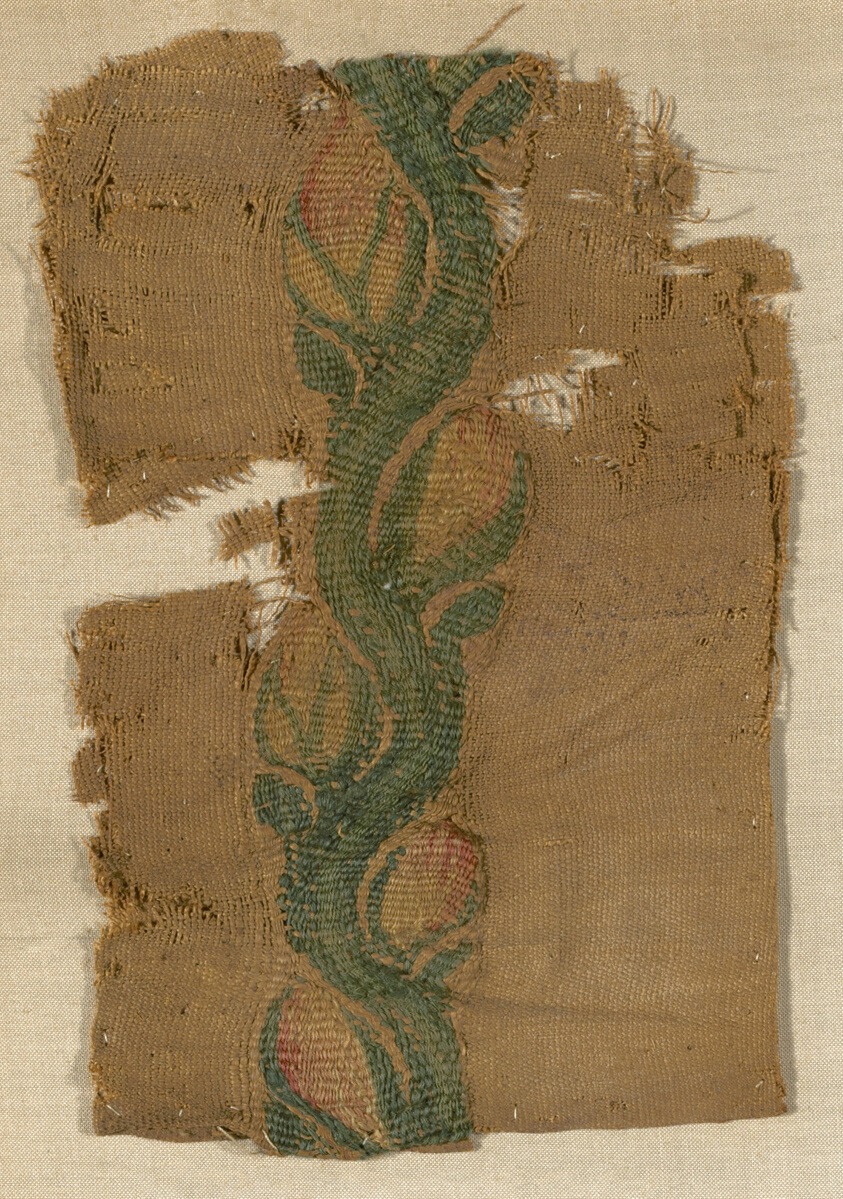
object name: Textile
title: Border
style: roman period (egyptian)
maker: Egypt, Akhmin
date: Roman period (30 B.C.– 641 A.D.), 5th/6th century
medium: Linen and wool, slit tapestry weave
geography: Egypt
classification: textile; weaving